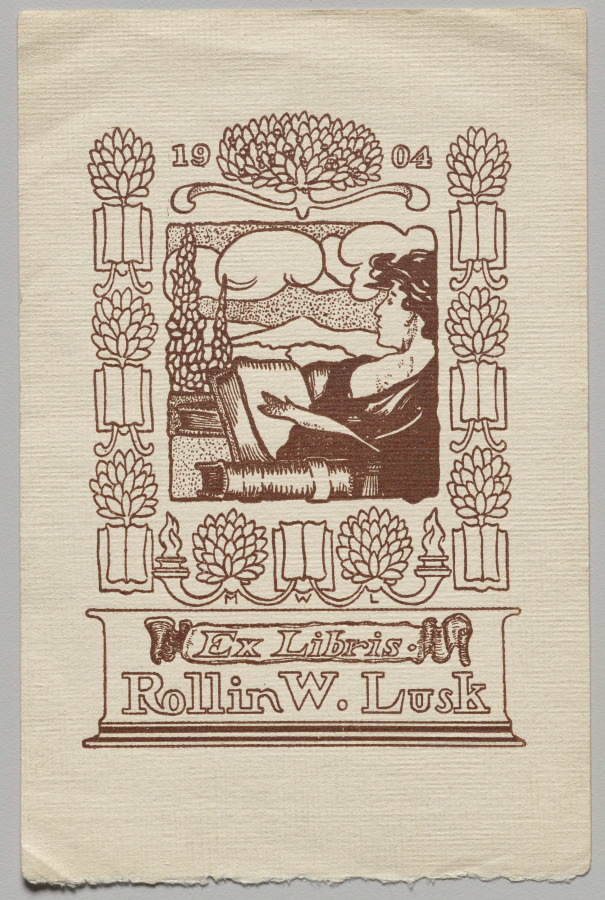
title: Bookplate: Rollin W. Lusk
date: 1904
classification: Print